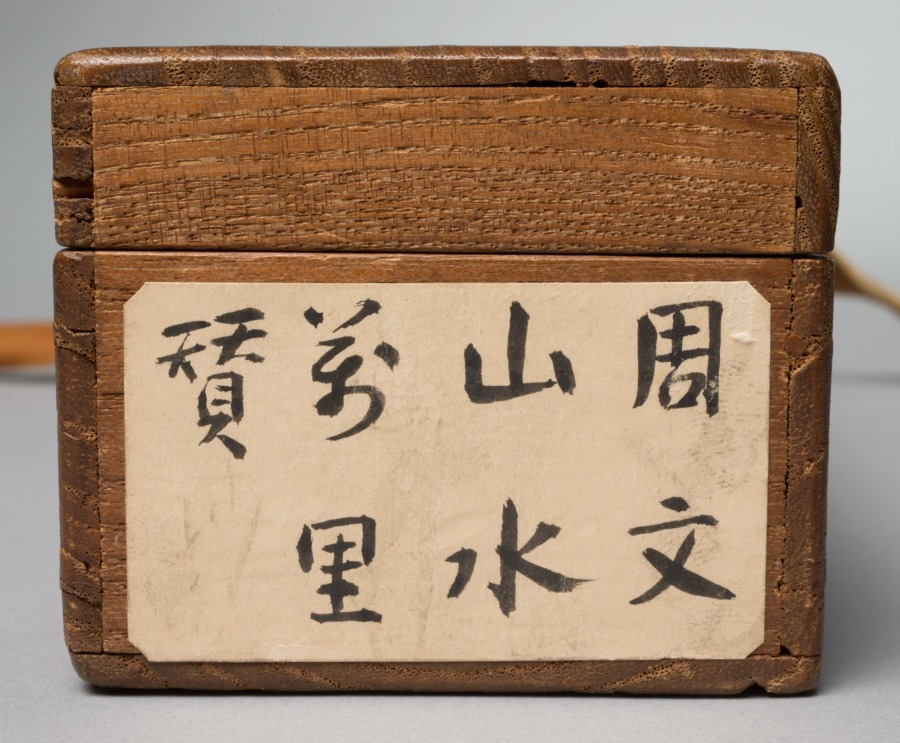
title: Lonely Temple and Towering Cliff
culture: Japan, Muromachi period (1392–1573)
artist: circle of Kenkō Shōkei (Japanese, active 1478–1506)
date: c. 1480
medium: hanging scroll; ink and slight color on paper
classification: Painting